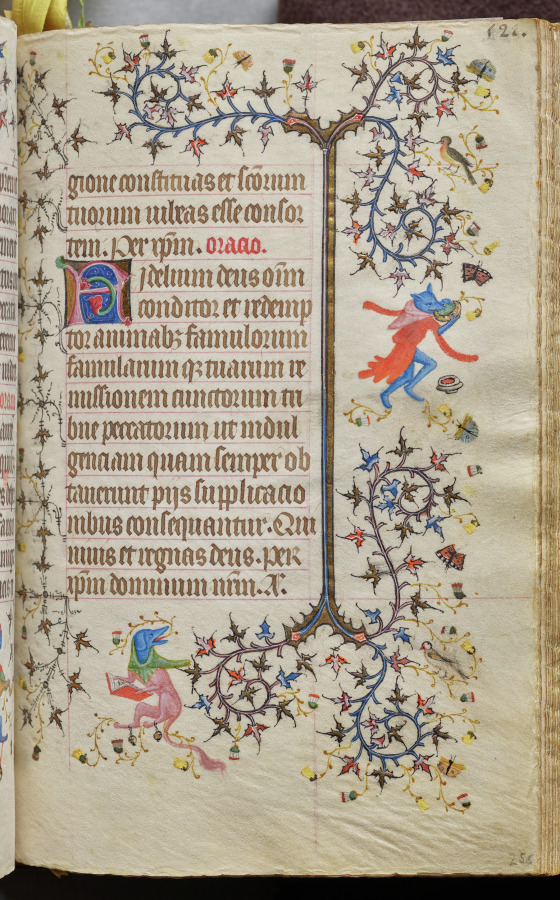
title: Hours of Charles the Noble, King of Navarre (1361-1425): fol. 255r, Text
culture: France, Paris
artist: Master of the Brussels Initials and Associates (French)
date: c. 1405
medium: ink, tempera, and gold on vellum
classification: Bound Volume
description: This precious volume was obviously highly prized by its owner, the French-born King of Navarre, who had his coat of arms painted on no less than twenty folios. Rather than directly commissioning this manuscript from a specific workshop, it seems that Charles the Noble acquired his book of hours -- perhaps ready-made for the luxury market -- while on a trip to Paris in 1404-05. A collaborative effort, six painting styles are evidenced within the pages of this codex, those of two Italians, two Frenchmen, and two Netherlanders. The painter who was responsible for the planning and decoration of the book, and who produced seventeen of the large miniatures, was a Bolognese artist known as the Master of the Brussels Initials. His principal assistant, responsible for most of the borders, was a Florentine who signed his name "Zecho" da Firenze on folio 208 verso.